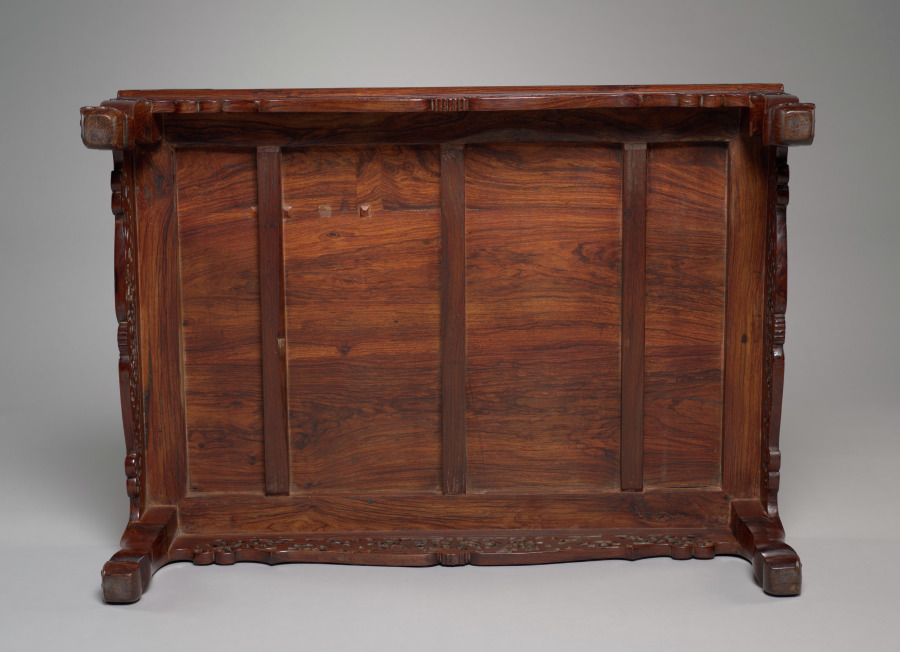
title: Low Table (kang zhuo) with Dragons in Clouds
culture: China, Ming dynasty (1368-1644) or Qing dynasty (1644-1911)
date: 1600s–1700s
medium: Rosewood (huanghuali) and metal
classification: Furniture and woodwork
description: Originally, low tables were placed on a kang, a raised platform made of brick and heated by a fire underneath, which served as a bed and living space on cold winter days in northern China. During the daytime, these platforms could accommodate two sitters with a kang table placed between them. In the warmer south, kang tables were used on daybeds made of wood. By the Ming and Qing dynasties, furniture makers used rare tropical hardwood, such as huanghuali, known as rosewood.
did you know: Note the curved legs, the elaborate openwork carving, and metal-fitted corners in the form of bats.